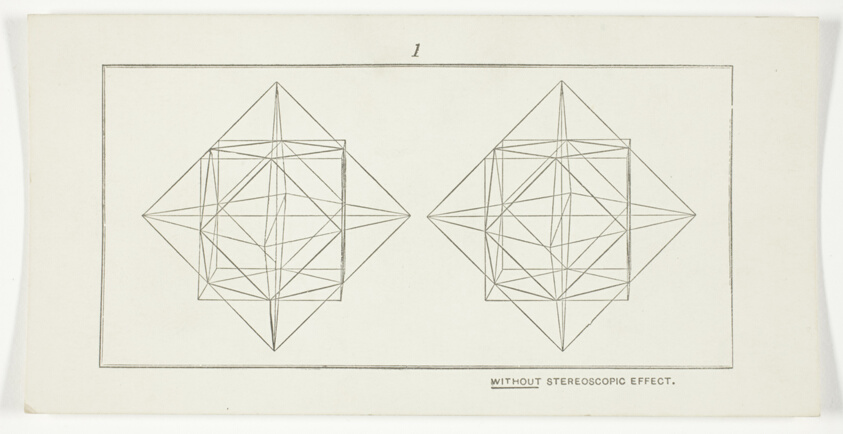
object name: Photograph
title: Without Stereoscopic Effect 1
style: 19th century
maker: Artist unknown; American, late 19th century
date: 1875/99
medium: Photolithograph, stereo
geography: United States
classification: photography; photograph